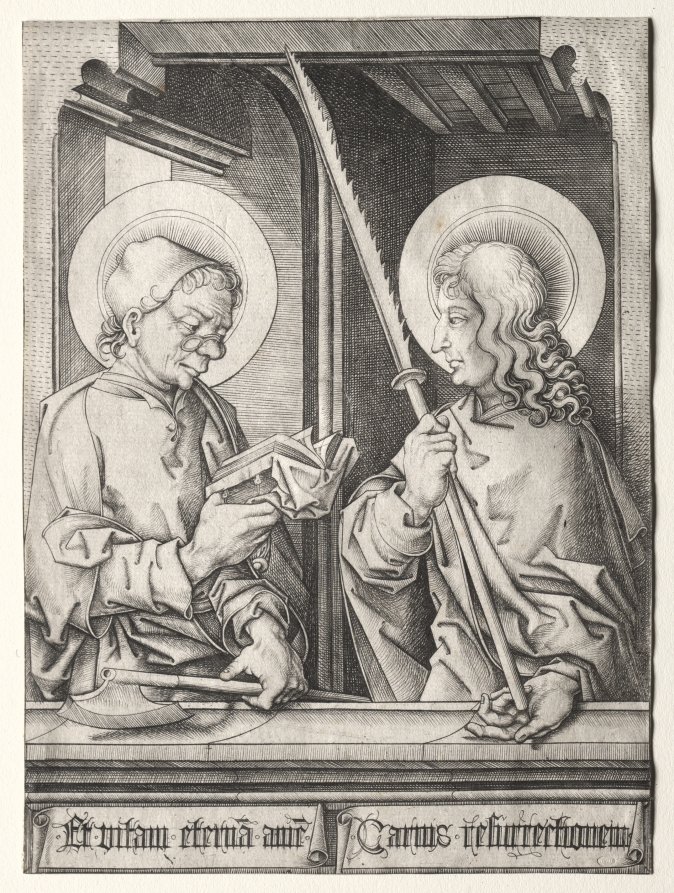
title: The Twelve Apostles at Gothic Windows: St. Matthias and St. Judas Thaddaeus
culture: Germany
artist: Israhel van Meckenem (German, c. 1440–1503)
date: c. 1485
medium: engraving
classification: Print